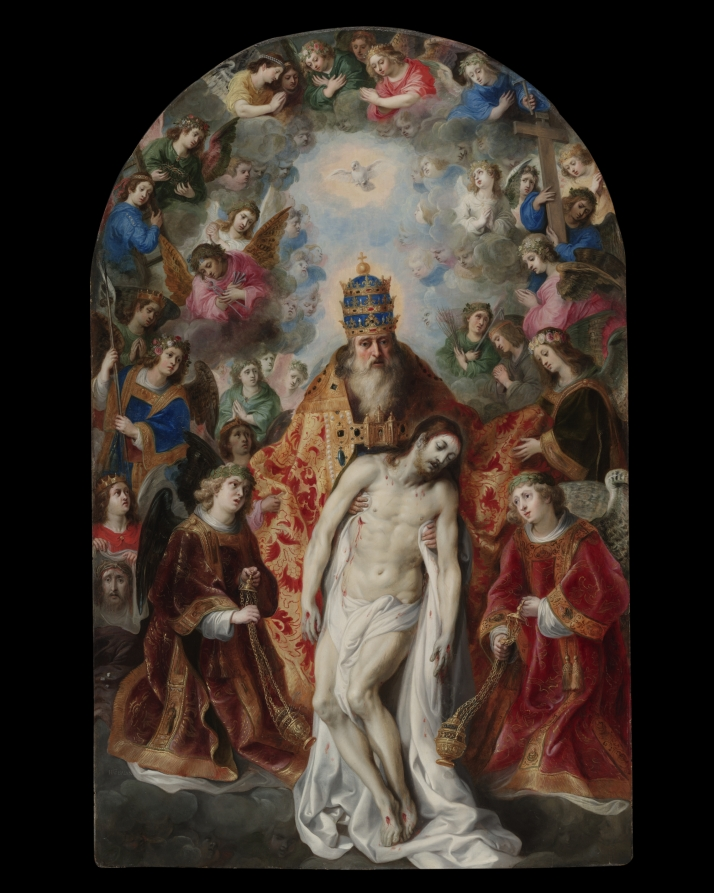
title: The Trinity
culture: Flanders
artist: Hendrik van Balen (Flemish, 1575–1632)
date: c. 1620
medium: oil on wood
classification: Painting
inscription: signed lower left: H.V. Balen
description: This vividly colored altarpiece was made in Antwerp, the center of religious learning in Catholic Flanders. In the mid-1500s when the Catholic Church mounted a defense against the spread of Protestant reforms, known as the Counter-Reformation, it encouraged the production of religious images that promoted Catholic doctrine, offering opportunities for artists like Rubens, Van Dyck, and Van Balen. Van Balen’s painting depicts the traditional theme of the Trinity, with God the Father holding the dead Christ and the dove of the Holy Spirit hovering above. Unusually, God wears the purple papal tiara, intended to emphasize the pope’s role as God’s true representative on earth. Encircling the figures of the Trinity are angels holding the instruments of Christ’s Passion. On the clasp of God’s elaborate cape is a small figure of Saint Barbara, perhaps a clue to the original location of the work in a chapel dedicated to her.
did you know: The crown worn by God in this painting resembles a papal tiara, last used by a Catholic pope in 1964.